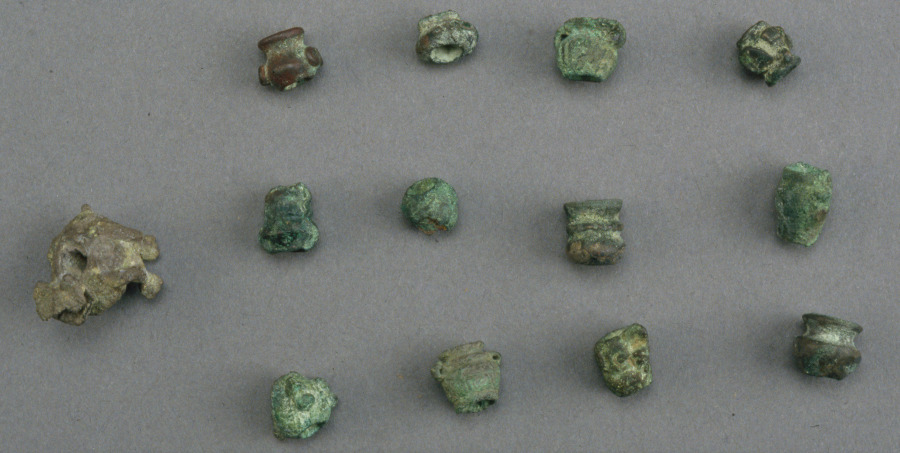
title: Medallion, beads, and spindle whorls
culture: Central Andes, North Coast, Chimú (medallion)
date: 1000–1532 (medallion)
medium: bronze, copper, silver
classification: Jewelry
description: This medallion and dozens of smaller beads and spindle whorls arrived at the museum strung on modern cord. Pierced with a hole at the top, it could have been suspended from a necklace or attached to a backing, such as a textile. It comes from Peru’s north coast and was made in the late pre-Hispanic period; the dates of the smaller beads are less clear.